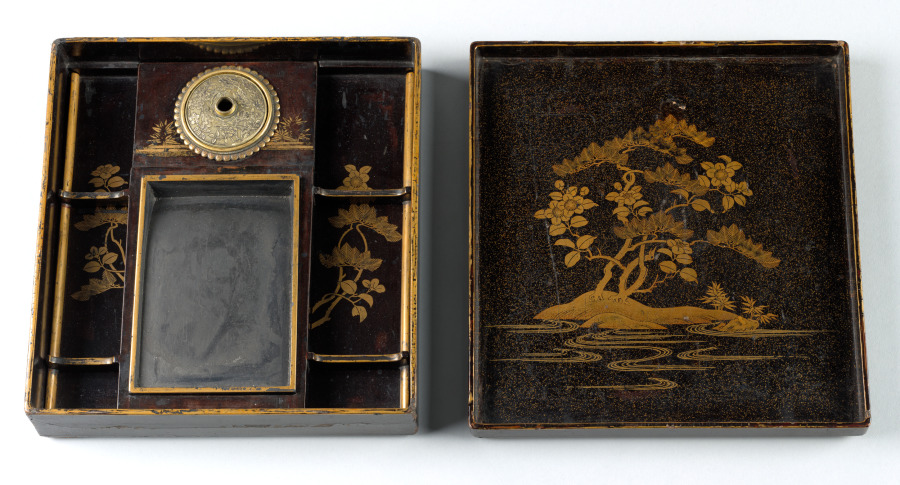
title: Writing Box (Suzuribako) with Pine, Camellia, and Bamboo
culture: Japan, Muromachi period (1392–1573)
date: 1400s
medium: Lacquered wood with gold and silver sprinkled powder (maki-e), stone, and metal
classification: Lacquer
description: Japanese writing boxes are designed to hold all the tools for traditional calligraphy, including an inkstone, water dropper, ink cake, and brushes. This box retains its inkstone and water dropper, the latter of which has a design of camellia and pine, matching the late winter, early spring lacquer motifs on the lid.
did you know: Pine, bamboo, and plum is a common seasonal motif; here the plum is replaced with camellia.